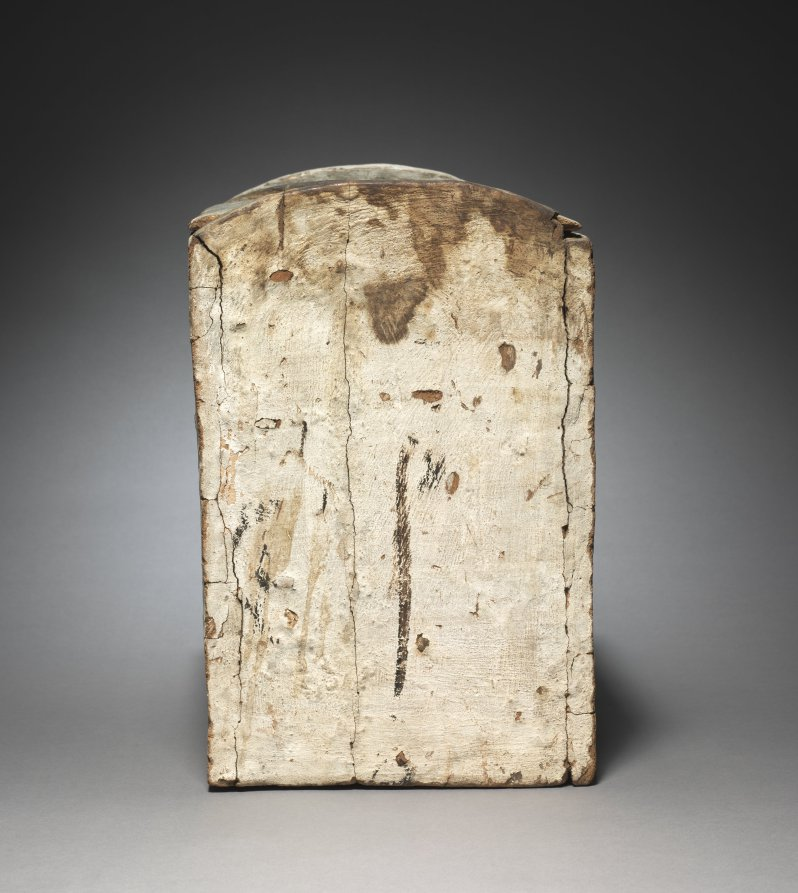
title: Shawabty Box of Bakenmut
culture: Egypt, Third Intermediate (1069–715 BCE), Dynasties 21–22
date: 1000–900 BCE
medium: gessoed and painted buckthorn wood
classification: Funerary Equipment